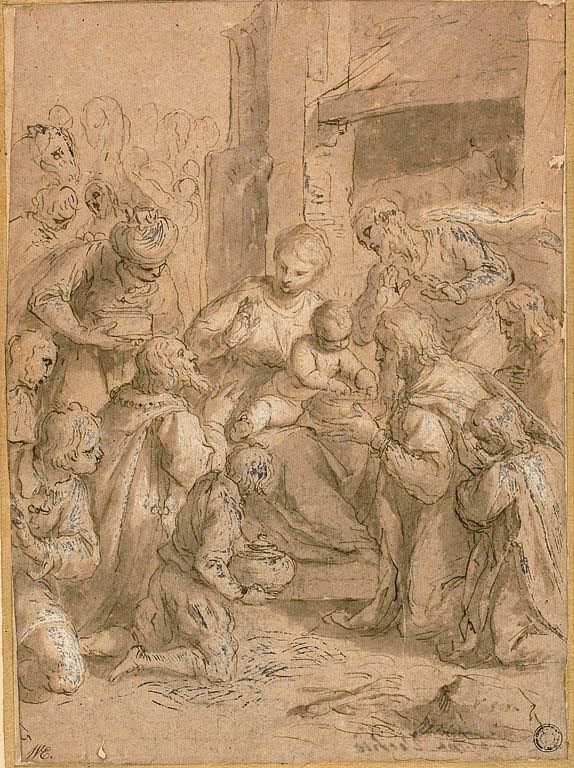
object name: Drawing and Watercolor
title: Study for the Adoration of the Magi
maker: Jacopo Negretti, called Palma il Giovane; Italian, c. 1548-1628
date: 1612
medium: Pen and brown ink, with brush and brown wash, heightened with lead white (partially oxidized) over traces of black chalk, on tan laid paper, laid down on cream wove card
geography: Italy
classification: ink with wash; drawings (visual works); prints and drawing